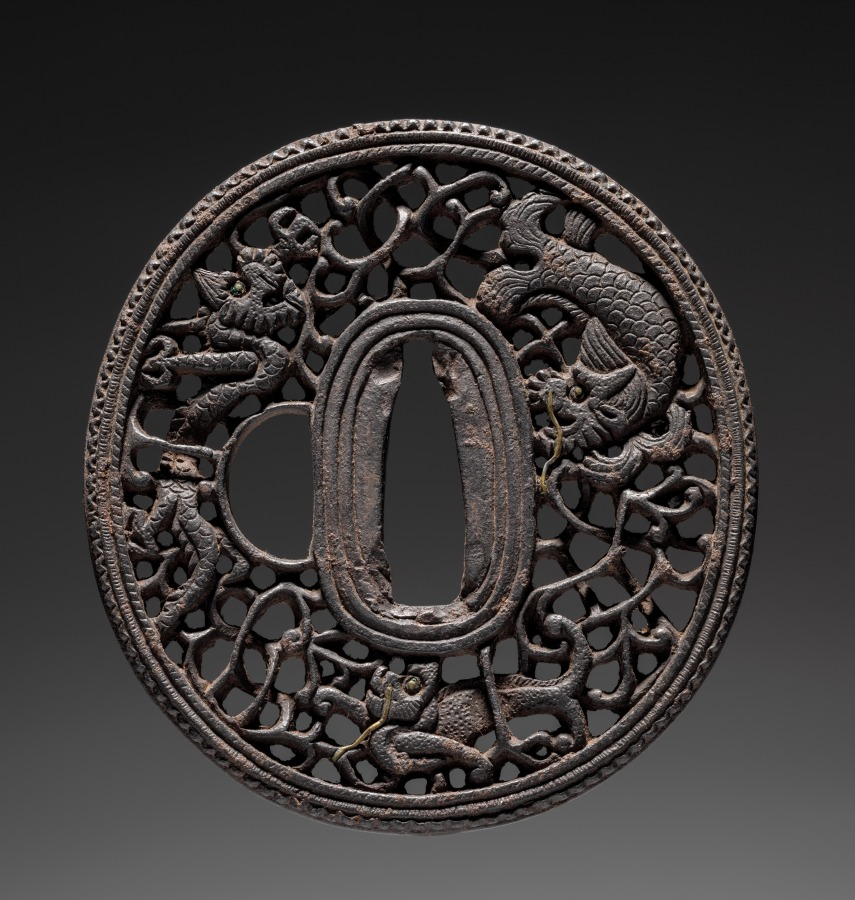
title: Sword Guard (Tsuba) with Dragon, Lion, and Sea Monster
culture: Japan, possibly Edo period (1615-1868)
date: c. 1615–1868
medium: iron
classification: Arms and Armor